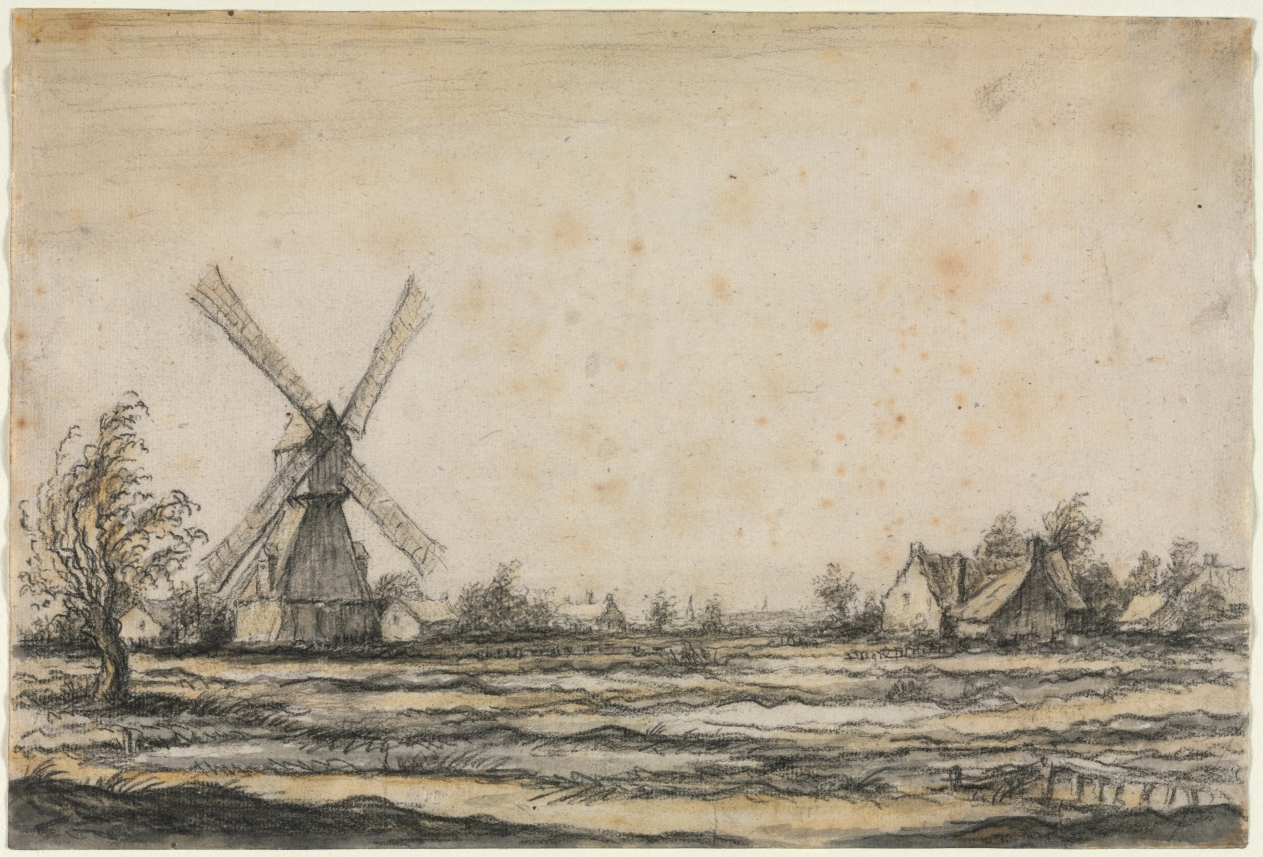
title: Landscape with a Windmill near a Farmstead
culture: Netherlands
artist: Aelbert Cuyp (Dutch, 1620–1691)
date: 1642–44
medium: black chalk and brush and gray wash and yellow watercolor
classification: Drawing